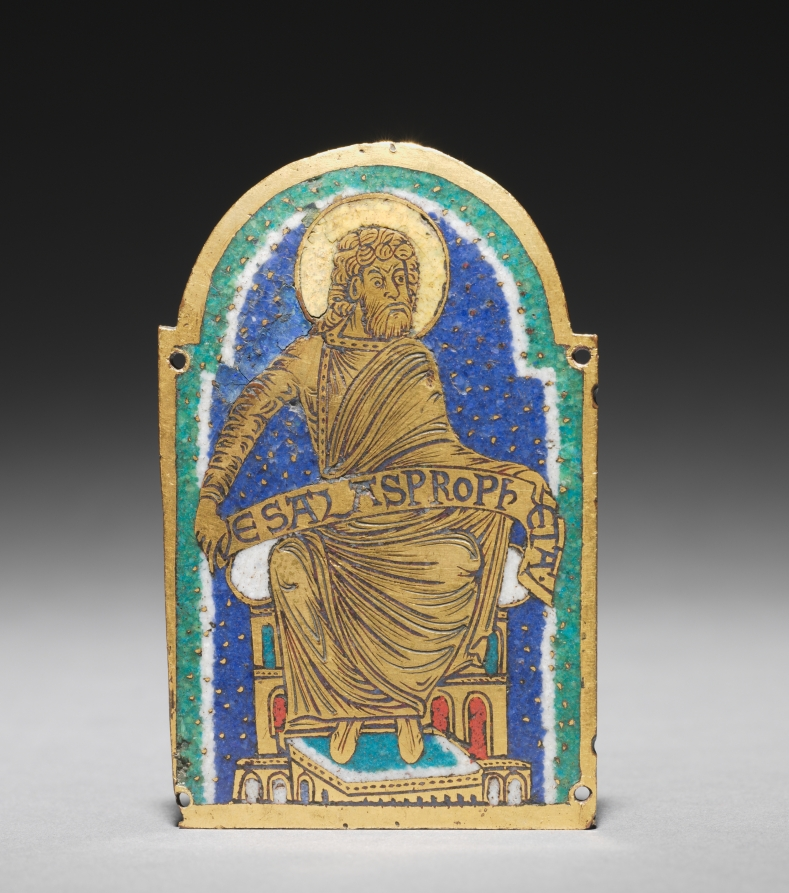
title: Plaque: Seated Prophet from a Reliquary Shrine: Esaias (Isaiah)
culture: Germany, Lower Saxony, Hildesheim, Romanesque period, 12th century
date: c. 1170–80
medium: gilded copper, champlevé enamel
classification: Enamel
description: Once used as decorations for a reliquary shrine, each enamel plaque represents a biblical prophet: Isaiah, Obadiah, Elisha, and Hosea. Fine gold dots punctuate dark blue backgrounds. Typical of Hildesheim enamels, this detailing creates the illusion that the prophets sit against star-studded twilight skies.